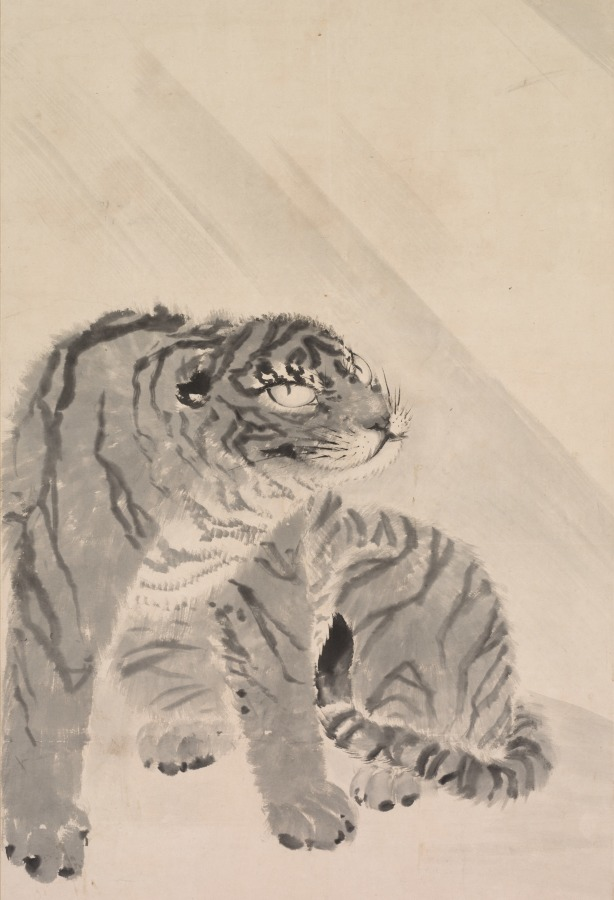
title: Tiger in Wind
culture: Japan, Edo period (1615–1868) to Meiji period (1868–1912)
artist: after Maruyama Ōkyo (Japanese, 1733–1795)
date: 1800s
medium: hanging scroll; ink on paper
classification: Painting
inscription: 「秋空一鶴」賛 長嘯一聲風括地「月渚」朱文方印「祐常之章」白文方印 壬辰初冬寫応挙 「應舉之印」白文方印・「仲選」白文方印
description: The seals appended to the inscription on this painting suggest that the text was brushed by Yūjō (1723–1773), an imperial prince who became a Buddhist monk and was abbot of Enman'in at Miidera. The line is from a poem attributed to a Yuan dynasty poet, Yu Ruyu (dates unknown), and describes the sound of a fierce wind lashing the ground. Wind is associated with the roar of the tiger. Yūjō was Maruyama Ōkyo's most important patron as a young artist, and this painting has a signature asserting that Ōkyo created it in 1772, the year before Yūjō's death. While Yūjō produced a preface for a now famous set of handscrolls he commissioned Ōkyo to paint, and a number of Ōkyo's compositions for Enman'in survive, this work would appear to be one imagining their relationship, as opposed to a genuine piece.